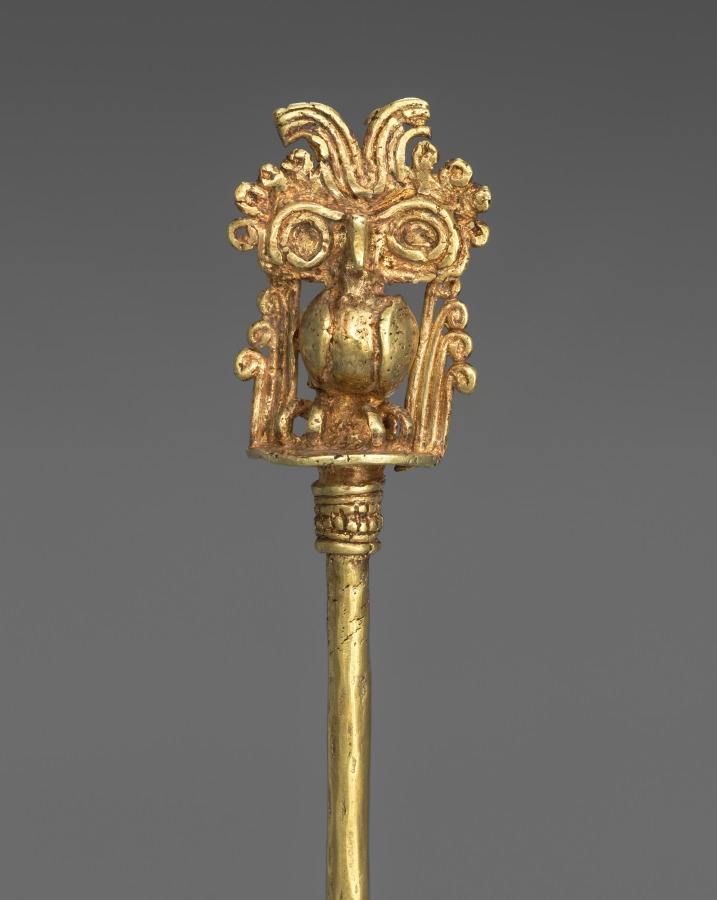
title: Lime Dipper or Pin with Owl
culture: Isthmian Region (Colombia), Calima, Yotoco period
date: 1–800 CE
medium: gold, cast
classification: Metalwork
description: An engaging miniature owl forms the finial of this dipper, which was used during coca-chewing rituals. Typically, coca leaves were chewed into a quid; then, with a dipper, lime made from powdered seashells was added to the quid to enhance the leaves' gentle stimulating effects. Contemporary natives regard coca as crucial to creating both social camaraderie and communion with supernatural forces; the same may have been true in the past.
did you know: Chewing coca leaves remains popular among indigenous communities in the Andean region.